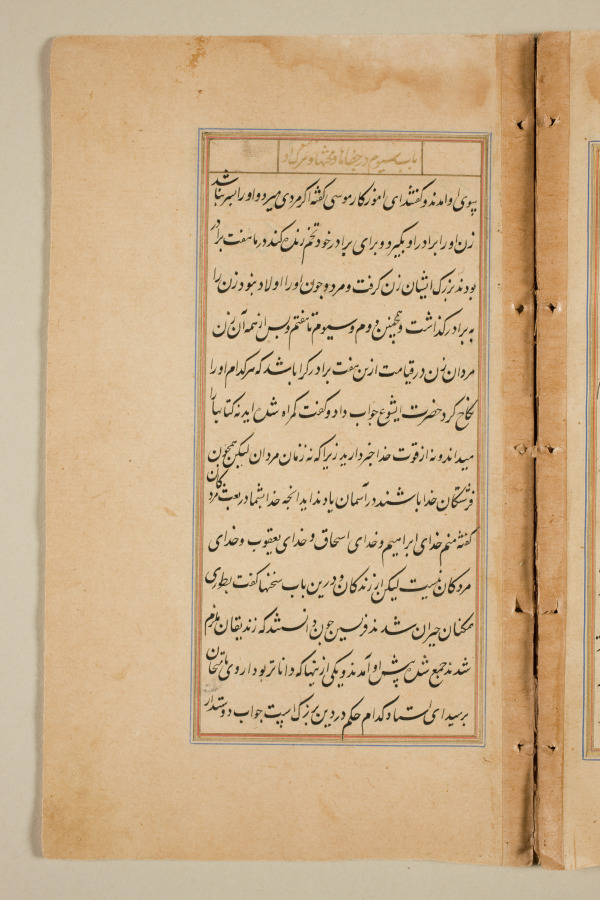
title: Text page from a Mirror of Holiness (Mir’at al-quds) of Father Jerome Xavier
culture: Mughal India, Allahabad, made for Prince Salim (1569–1627)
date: 1602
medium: Ink and gold on paper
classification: Manuscript